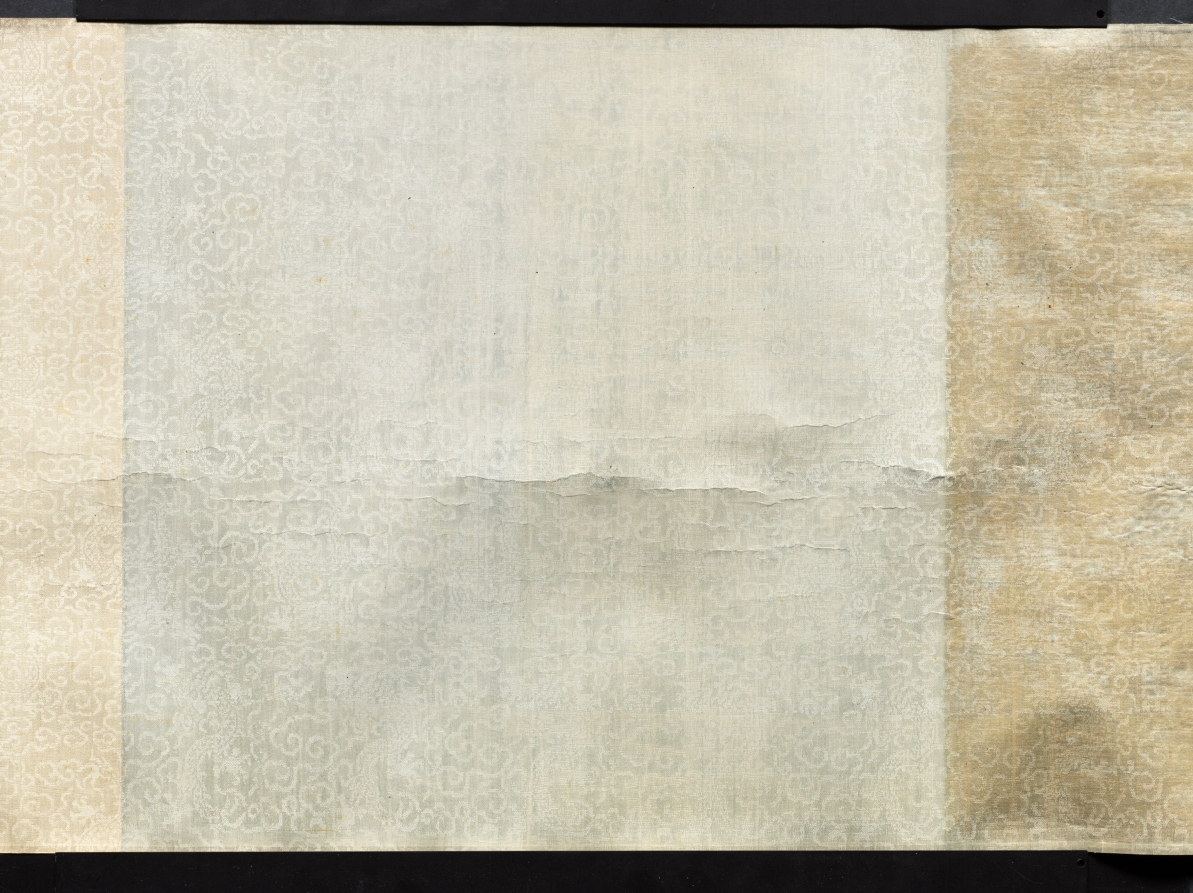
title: Landscape, The Palace of the Clouds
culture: China, Qing dynasty (1644-1911)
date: 1644–1911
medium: handscroll, ink on silk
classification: Painting